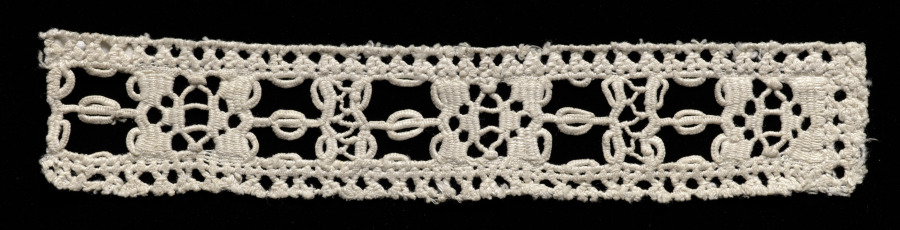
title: Lace fragment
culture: Italy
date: 1500s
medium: Linen: needle lace (drawnwork) insertion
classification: Lace